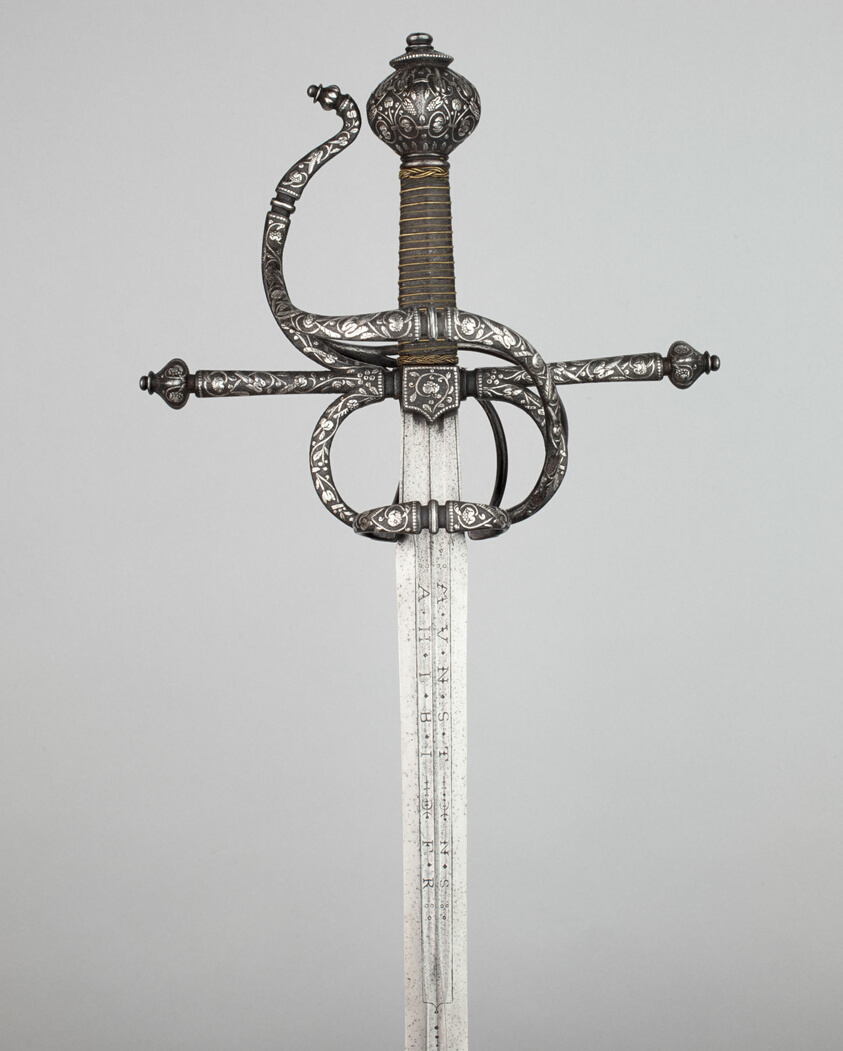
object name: Arms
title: Rapier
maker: Hilt: German; Blade: member of the Munsten family; German, Solingen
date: 1610/30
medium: Iron, steel, silver, brass, and wood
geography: Solingen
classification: edged weapon-sword; arms; arms and armor